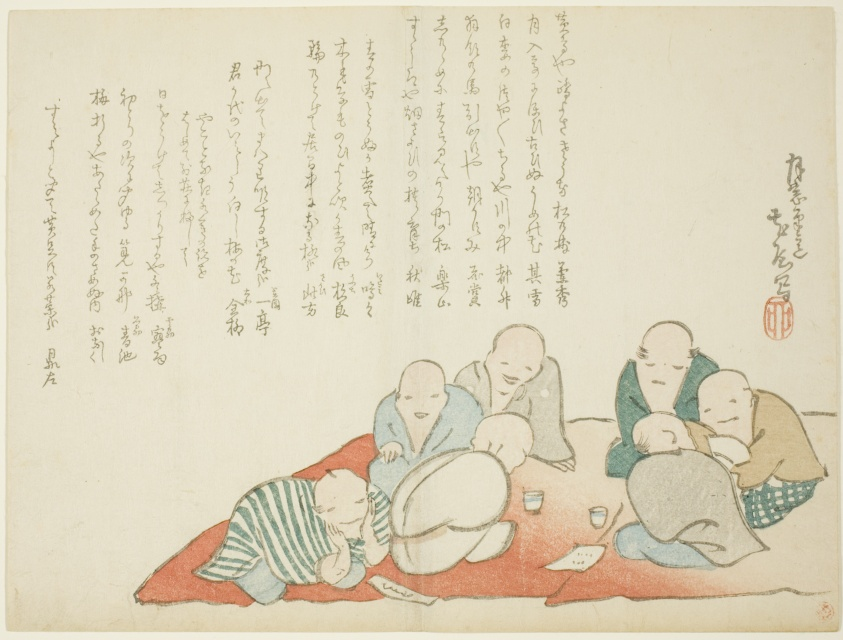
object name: Print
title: Meeting of a Poetry Club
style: Japanese (culture or style)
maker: Fujii Teisa (Japanese, 1802-1869)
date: c. 1860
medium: Color woodblock print, surimono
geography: Japan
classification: woodblock print; print; asian art